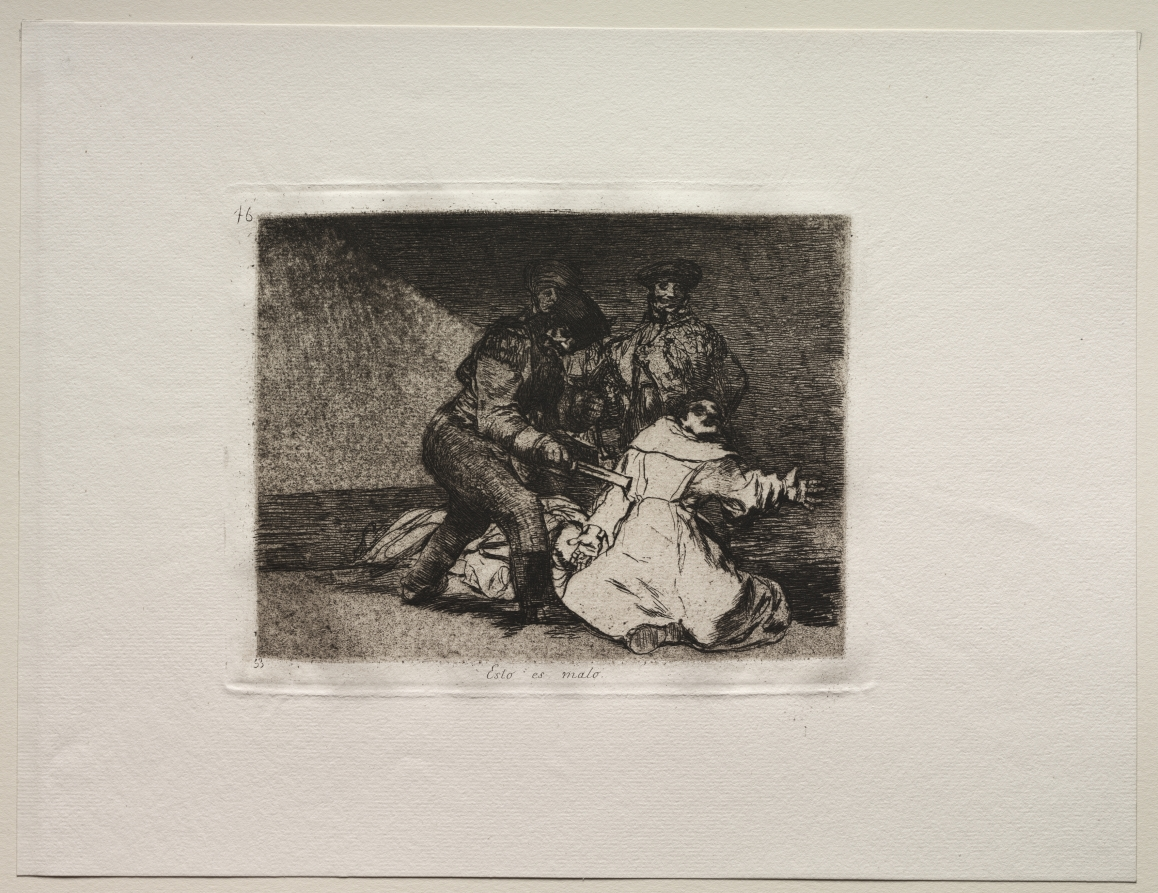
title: The Horrors of War: This Is Bad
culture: Spain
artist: Francisco de Goya (Spanish, 1746–1828)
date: c. 1810–20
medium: etching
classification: Print